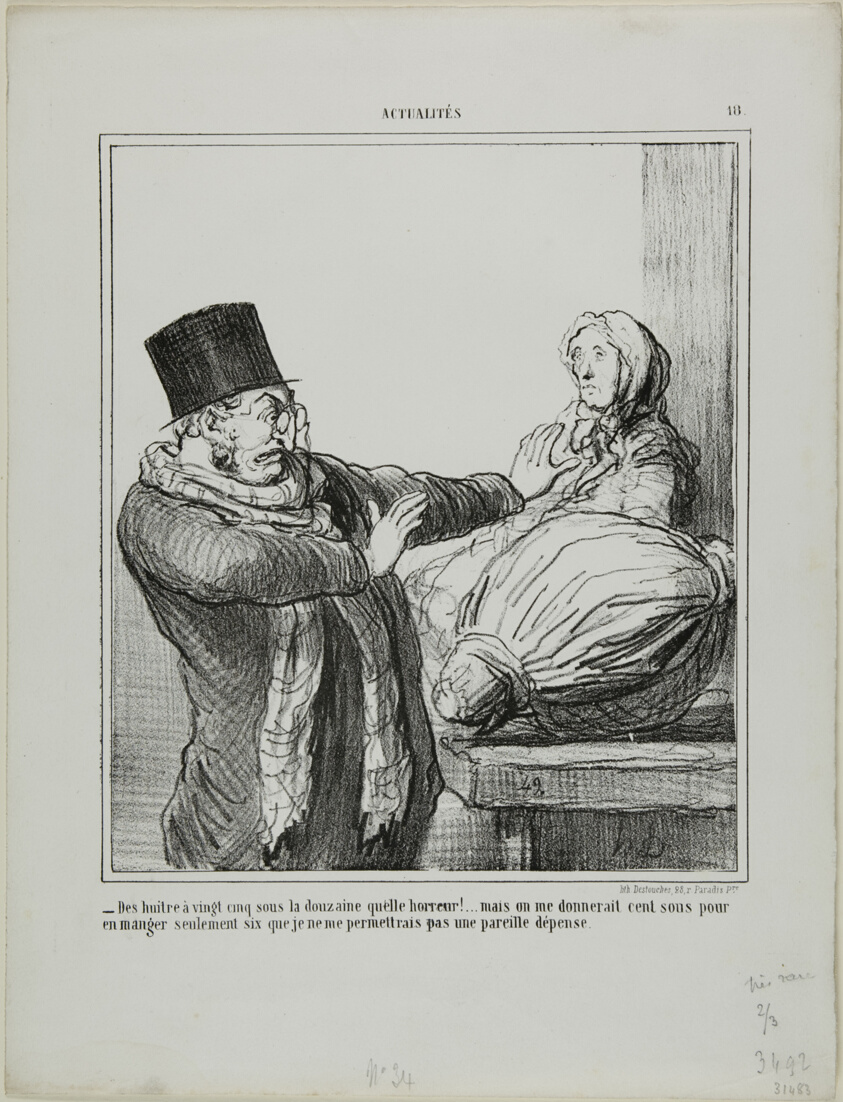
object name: Print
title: “- Oysters at 25 sous a dozen, horrible!... Even if you gave me 100 sous to eat half a dozen, I would not allow myself such an expense,” plate 18 from Actualités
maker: Honoré Victorin Daumier; French, 1808-1879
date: 1866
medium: Lithograph in black on white wove paper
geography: France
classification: lithograph; print; prints and drawing